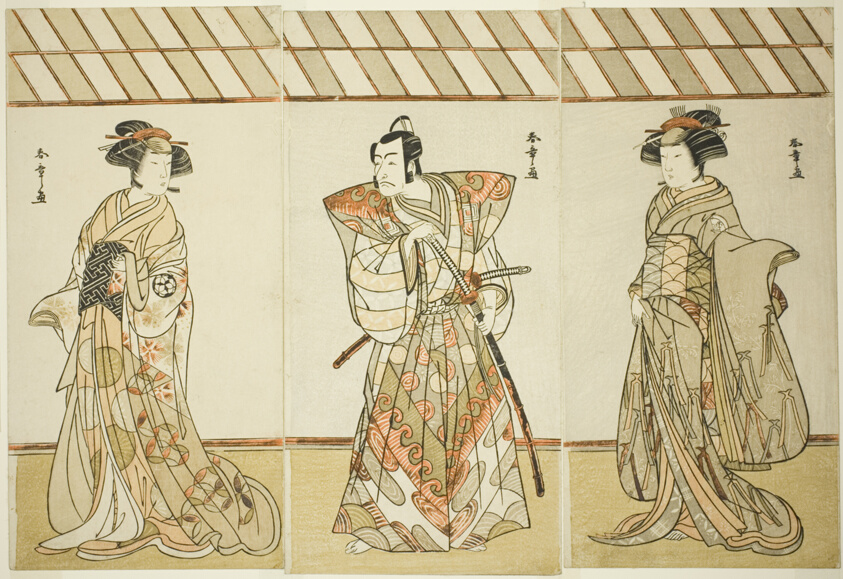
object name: Print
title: Actors Onoe Tamizô I, Ichikawa Danjûrô V, and Osagawa Tsuneyo II, in (possibly) “A Dandyish Brocade: Opposing Warriors” (“Date Nishiki Tsui noYumitori”)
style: Japanese (culture or style)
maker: Katsukawa Shunshô 勝川 春章; Japanese, 1726-1792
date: About 1778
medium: Color woodblock prints; hosoban triptych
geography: Japan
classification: woodblock print; print; asian art